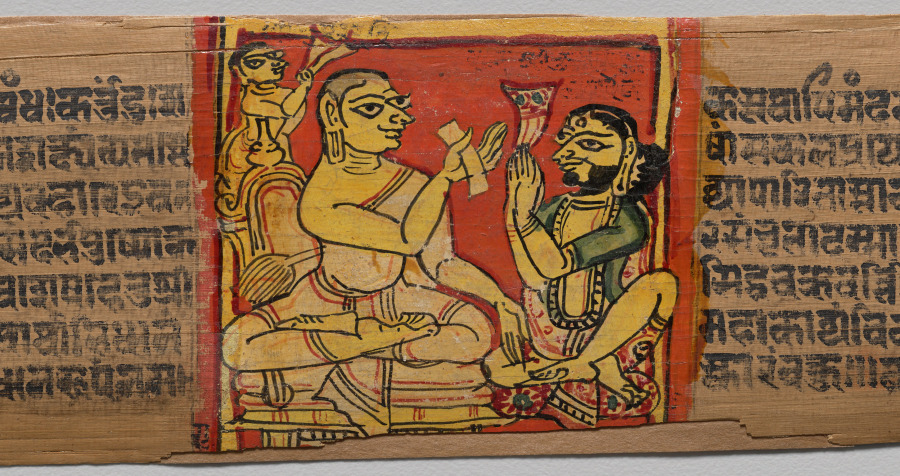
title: King Kumarapala Pays Reverence to Hemachandra: Folio 2 (recto), from a Great Poem about Twos (Dvyashraya Mahakavya) of Hemachandra with Commentary by Abhayatilaka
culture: Western India, Gujarat, possibly Patan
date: 1428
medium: Gum tempera and ink on palm leaf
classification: Painting